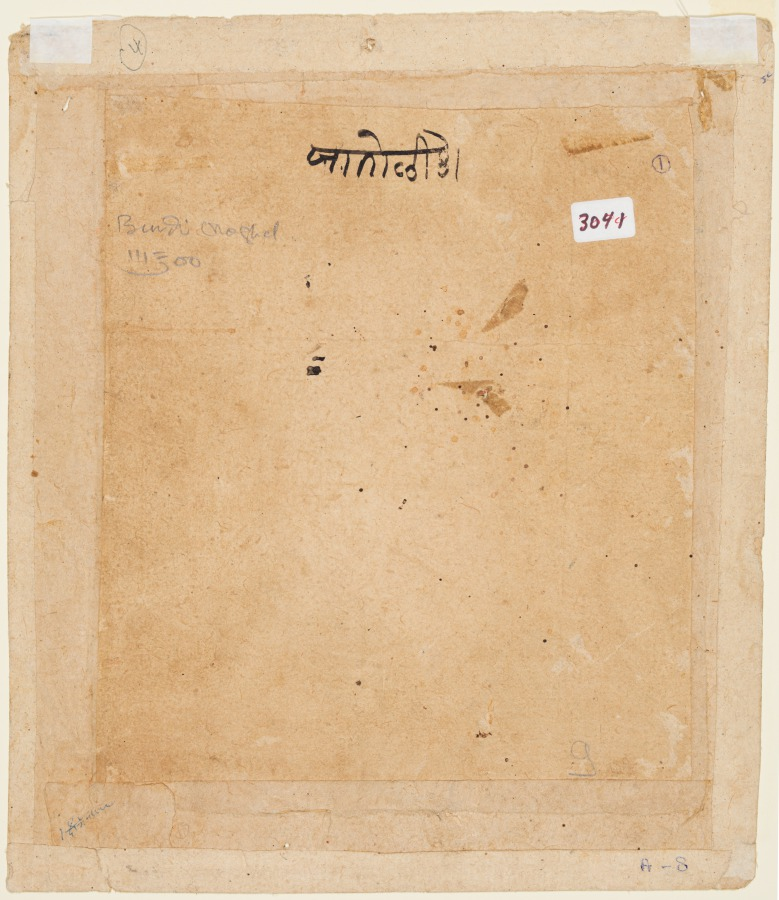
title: Prince Mathu Singh of Jatoli on a Blue Horse Riding to Udaipur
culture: Northwestern India, Rajasthan, Rajput Kingdom of Mewar or Jatoli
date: c. 1720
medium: gum tempera, ink, and gold on paper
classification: Painting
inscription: [[recto, upper margin]] kavarajī śrī matu [?] siṃgha jī kī udaipura suyorī pāra āye nila [[above, correction, crossed out]] [?]jīma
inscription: [[recto, lower margin]] kavara jī śrī mathu sīṃgh jī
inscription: [[verso, upper center]] jatolī ko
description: This painting commemorates the nearly 600-kilometer journey of Mathu Singh on horseback from the tiny principality of Jatoli in eastern Rajasthan to Udaipur, capital of the powerful Mewar Kingdom. The young prince wears a white transparent muslin, and his stallion rears on his hind legs, marking the beginning of the ride. A heedful royal servant gently waves a fly-whisk, which indicates the rider’s royal status.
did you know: The prince travels armed with bow and arrows, sword, and dagger.